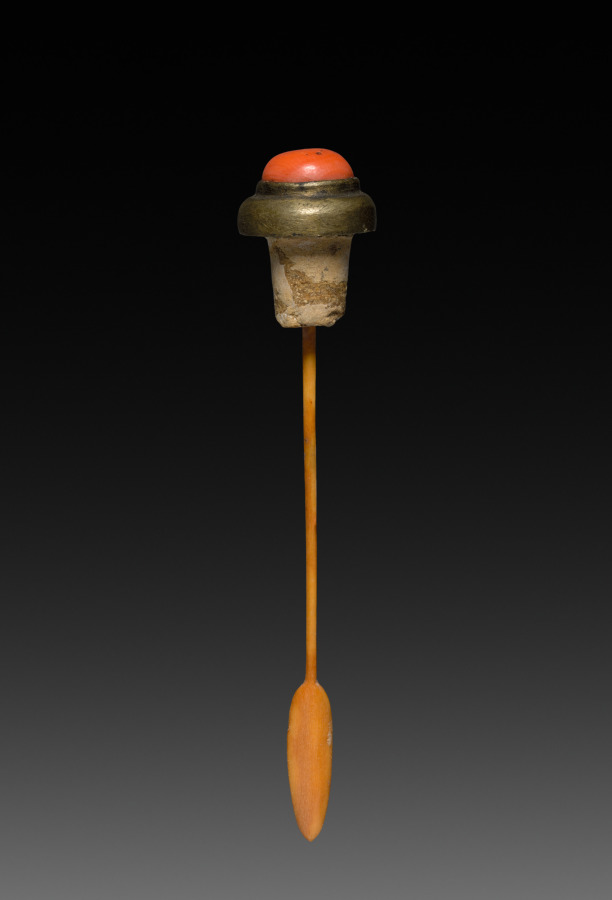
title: Snuff Bottle with Stopper (stopper)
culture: China, Jiangxi Province, Jingdezhen kilns, Qing dynasty (1644–1911), Yongzheng reign (1723–35)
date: 1723–35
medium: porcelain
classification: Ceramic